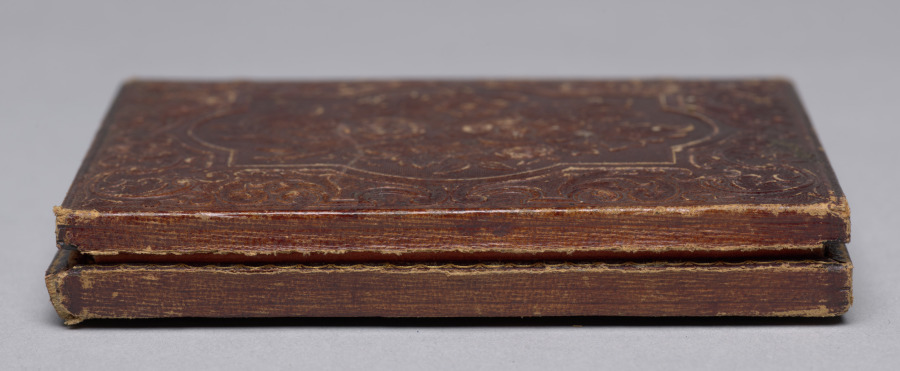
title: Prize Horse in winter, Chemung County, New York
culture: America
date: c. 1852–56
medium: daguerreotype, quarter plate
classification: Photograph